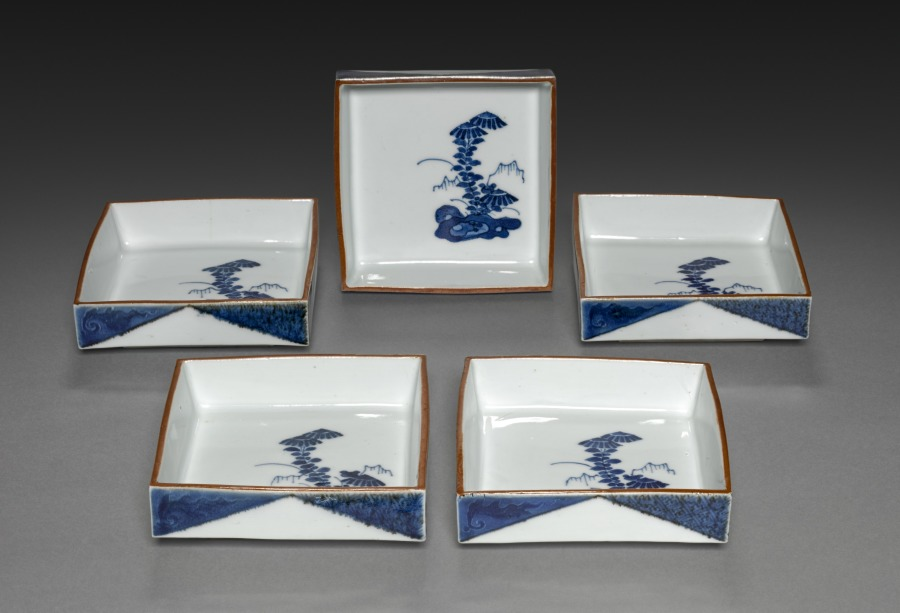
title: Side-Dishes with Dandelion in Rocks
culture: Japan, Edo period (1615–1868)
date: 1700s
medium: Set of five dishes; porcelain with underglaze blue and overglaze iron oxide (Arita ware, Kutani style)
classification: Ceramic